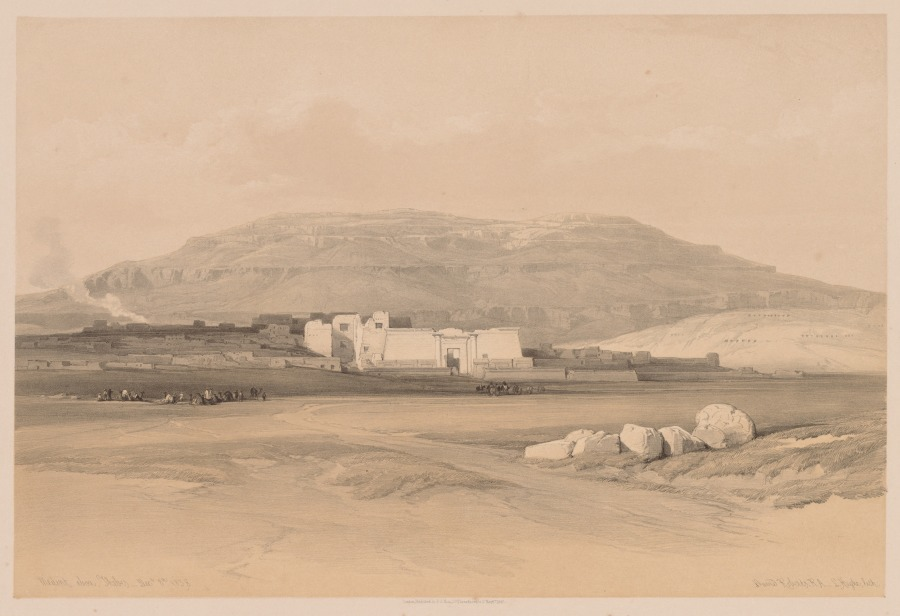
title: Egypt and Nubia: Volume II - No. 20, Medinet Abou, Thebes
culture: England, 19th century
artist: Louis Haghe (British, 1806–1885)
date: 1838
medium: color lithograph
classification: Print